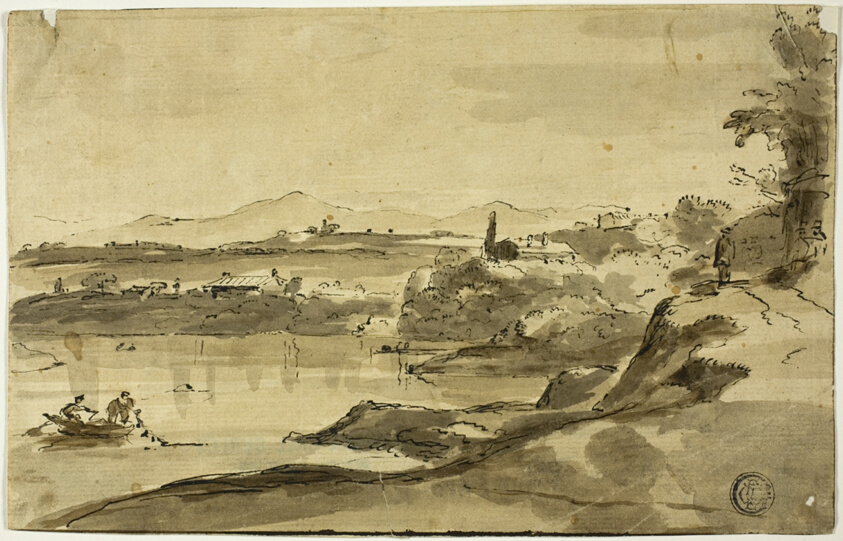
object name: Drawing and Watercolor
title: Landscape with Fisherman in Lake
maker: Adam Pynacker (Dutch, 1622-1673)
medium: Pen and brown ink, with brush and brown wash, on ivory laid paper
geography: Holland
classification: ink or chalk wash; drawings (visual works); prints and drawing